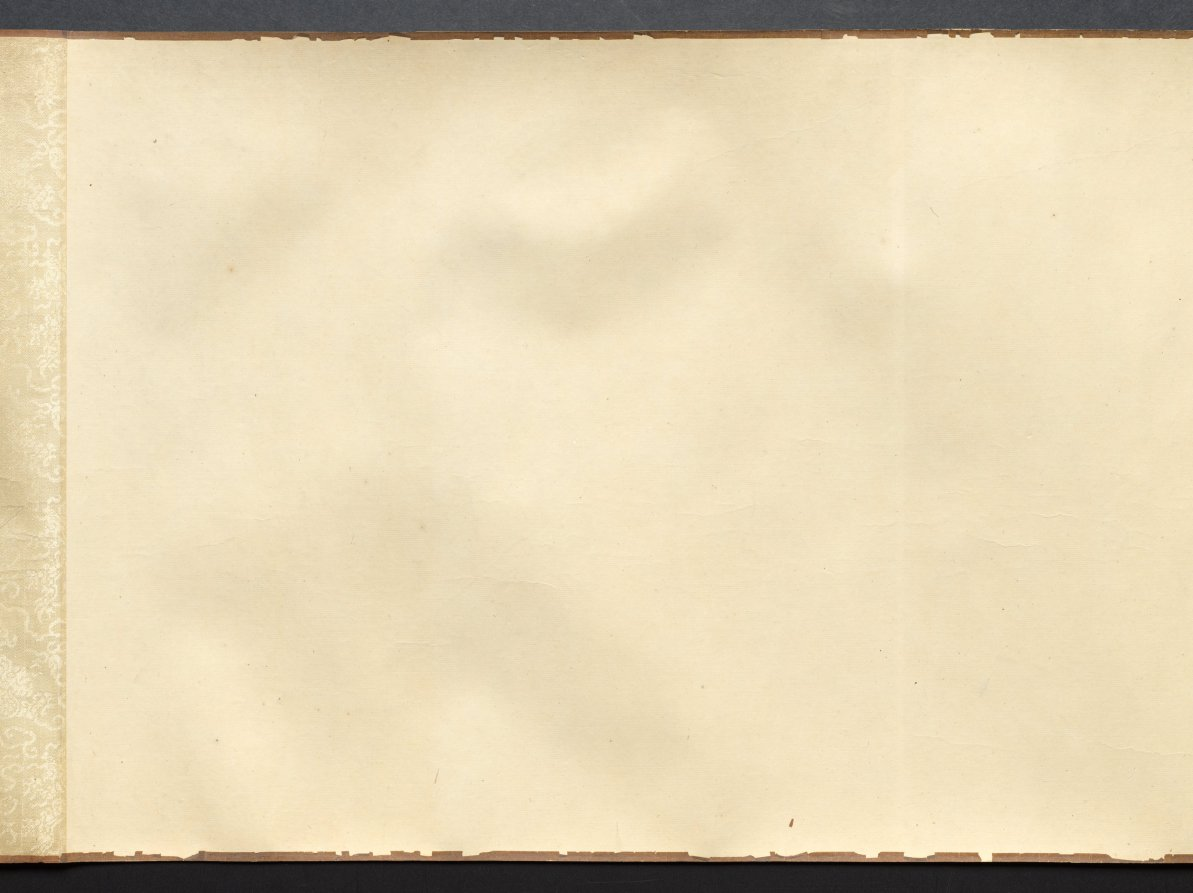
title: Returning to the Village in a Rainstorm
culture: China, Ming dynasty (1368–1644)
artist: Xie Shichen (Chinese, 1487–after 1567)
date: 1530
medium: Handscroll; ink and light color on silk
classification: Painting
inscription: 風雨歸村圖 嘉靖庚寅秋日樗仙謝時臣. [印] 謝時臣印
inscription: 3 additional seals unidentified.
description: This scroll depicts a wind- and rainswept landscape with figures in the countryside struggling against a late summer monsoon rainstorm. Such weather was familiar to residents of the lower Yangzi delta. Xie Shichen spent most of his life in the Suzhou area. Details of his career are scant, but his surviving works suggest that he made his living as a professional painter. This painting conveys drama and anecdotal observations, characteristic of Zhe school paintings, such as the one by Lü Wenying, CMA 1970.76.